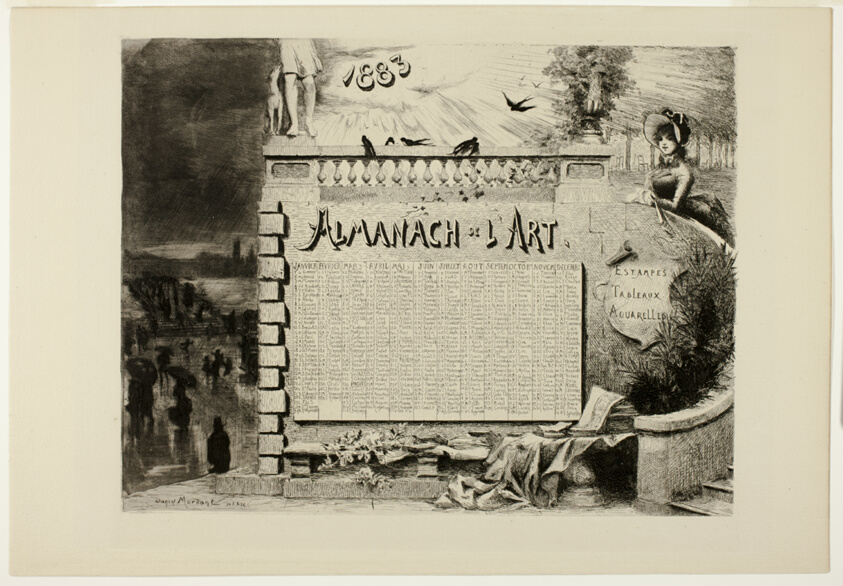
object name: Print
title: Almanac for L'Art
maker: Daniel Charles Marie Mordant (French, c. 1853-1914)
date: published 1883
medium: Etching, with drypoint, aquatint, and plate tone, on cream laid paper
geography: France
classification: prints and drawing; print; etching